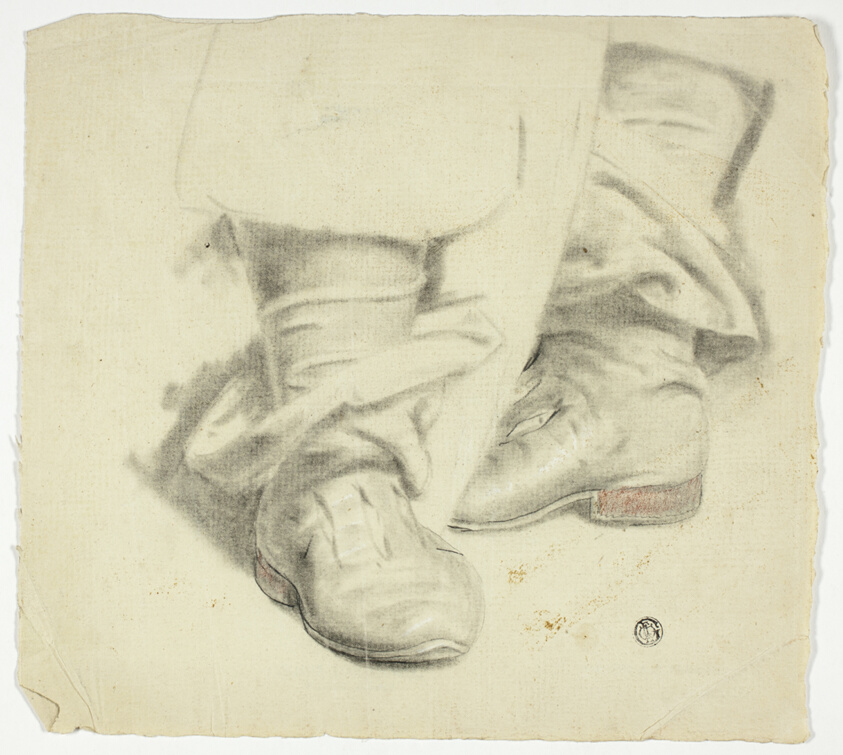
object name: Drawing and Watercolor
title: Seventeenth Century Boots of Standing Figure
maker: John Downman (English, 1750-1824)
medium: Charcoal, with stumping and red crayon, heightened with white chalk, on cream wove paper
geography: England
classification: charcoal; drawings (visual works); prints and drawing